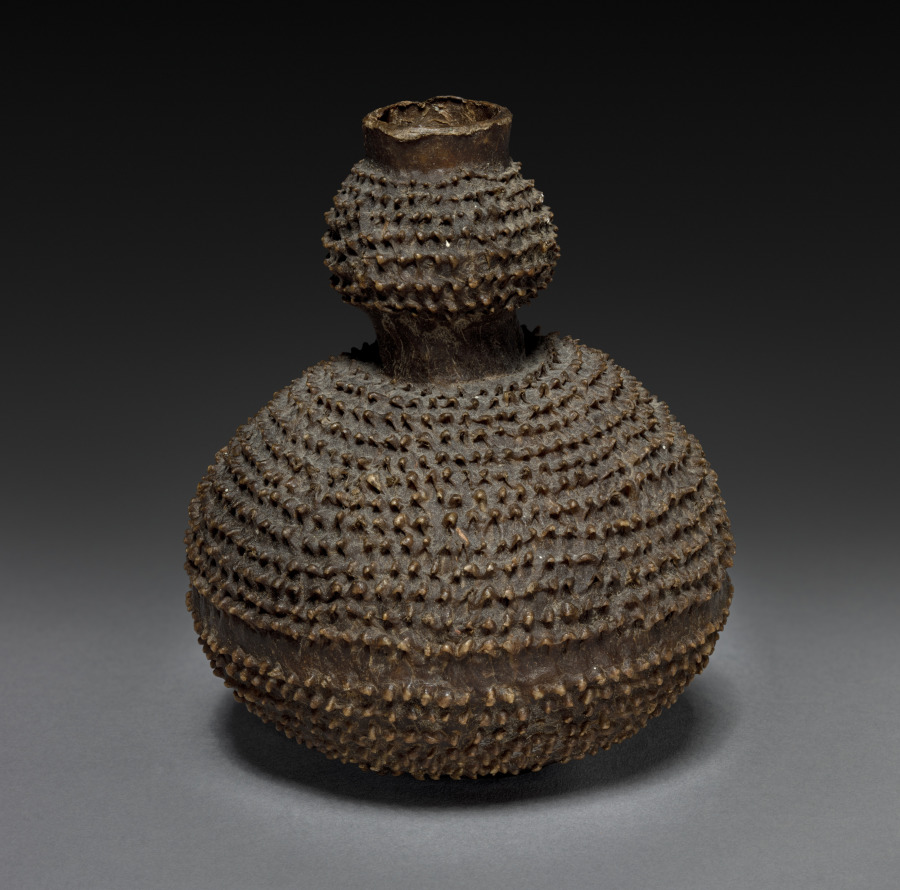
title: Snuff Container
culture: Africa, Southern Africa, South Africa, Xhosa-style maker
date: late 1800s or early 1900s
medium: Hide, earth, and blood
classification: Vessels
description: Snuff containers made from a mixture of hide, earth, and blood constitute a very rare type of object in the artistic production of southern Africa. The specific gourdlike shape is an even more unusual occurrence. Its materials and purpose refer to the communication between animals and humans.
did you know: The tobacco product snuff was stored in decorative, yet useful, containers like this one.